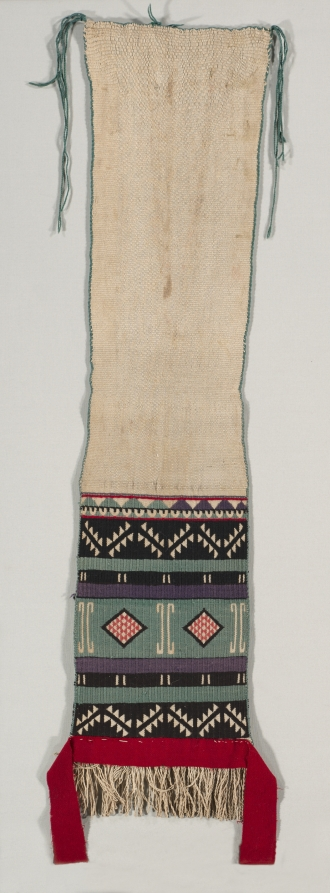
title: "Hopi Brocade" style Dance Sash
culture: America, Native North American, Southwest, Pueblo (Hopi?), Post-Contact, Transitional Period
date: c. 1880–1900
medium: plain weave with supplementary weft wrap: cotton and wool (handspun, Germantown, and bayeta)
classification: Textile